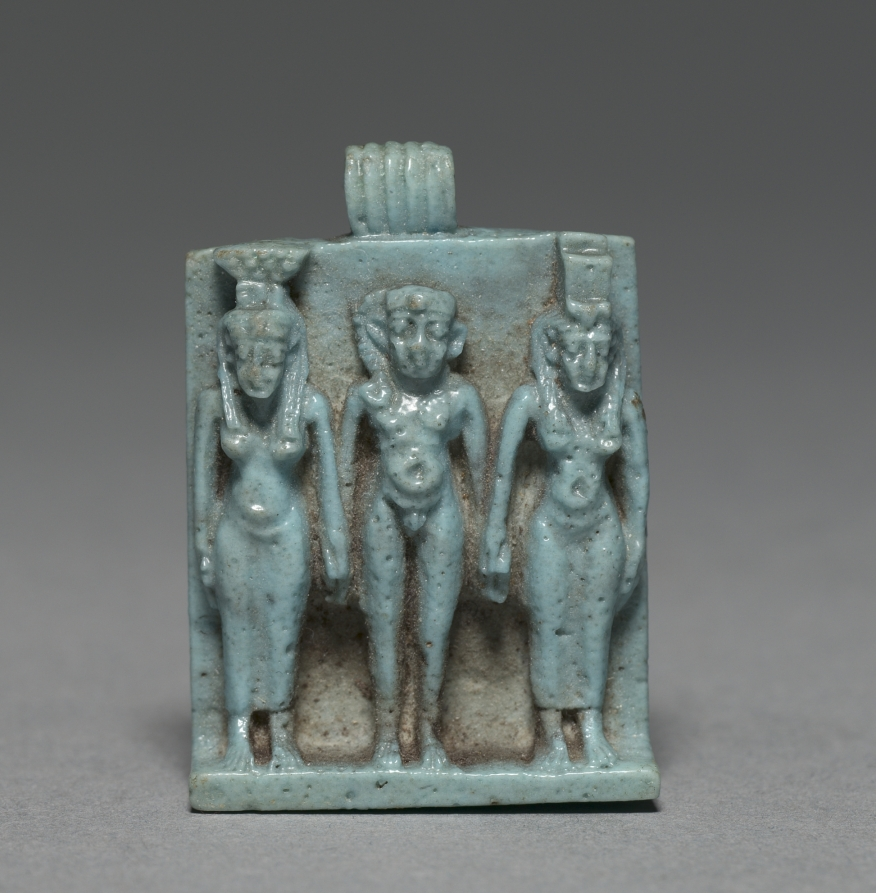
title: Triad: Horus between Isis and Nephthys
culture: Egypt, Late period (715–332 BCE), Dynasty 26 or later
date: 664–525 BCE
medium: pale turquoise faience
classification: Amulets